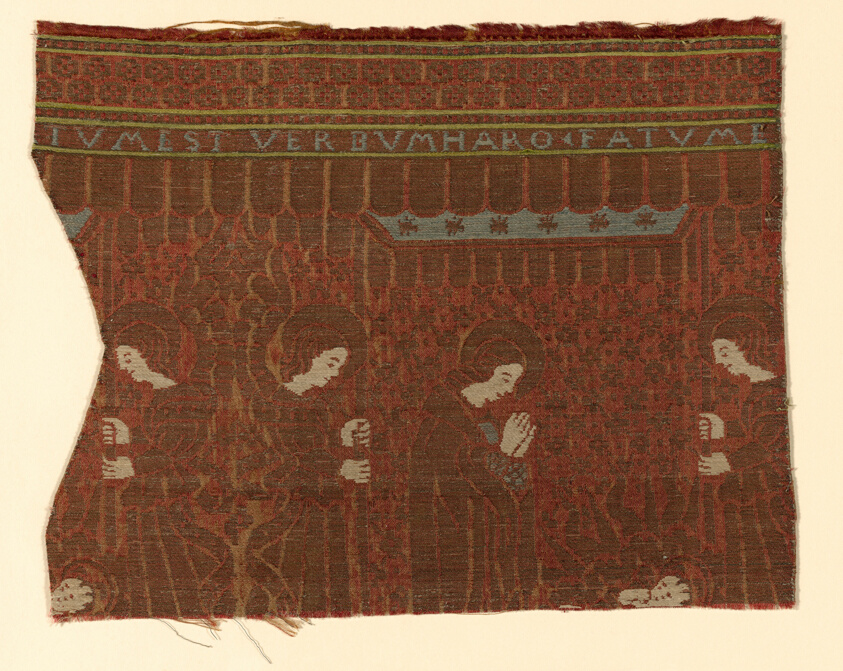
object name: Textile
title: Fragment from an Orphrey Band Depicting the Nativity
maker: Italy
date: 15th century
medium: Silk and gilt-animal-substrate-wrapped linen, warp-float faced 4:1 satin weave with weft-float faced 1:2 'S' twill interlacings of secondary binding warps and supplementary patterning wefts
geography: Italy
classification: textile; weaving; liturgical